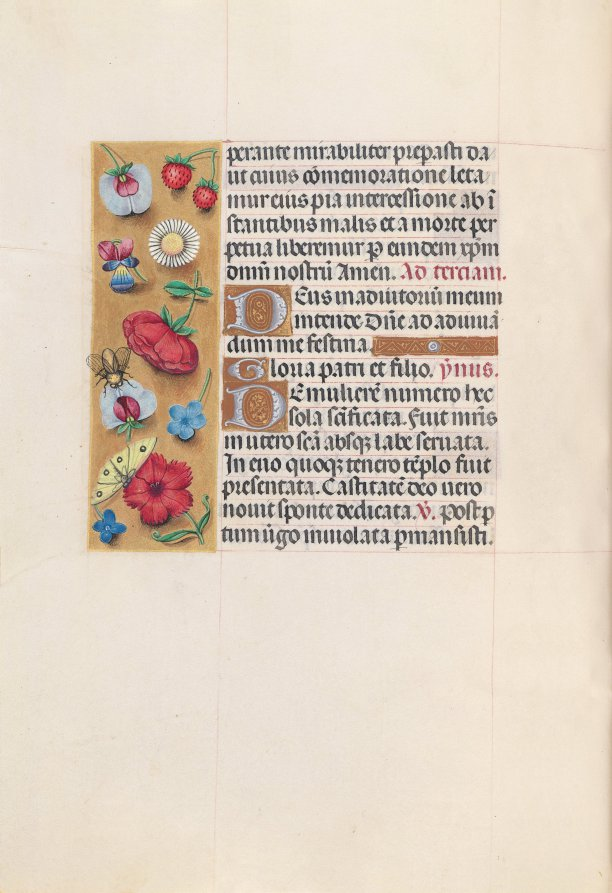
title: Hours of Queen Isabella the Catholic, Queen of Spain: Fol. 82v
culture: Flanders, Ghent and Bruges, late 15th century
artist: Master of the First Prayerbook of Maximillian (Flemish, c. 1444–1519)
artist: and Associates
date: c. 1500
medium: ink, tempera, and gold on vellum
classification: Bound Volume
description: This manuscript was illuminated by a circle of at least five highly organized manuscript painters active in the Flemish cities of Ghent and Bruges. The principal illuminator was Alexander Bening, who painted the majority of the book's miniatures. Manuscripts produced by this circle of artists are renowned for the decoration of their borders, which typically feature a rich variety of realistically-painted flowers, birds, and butterflies. This prayer book, called a book of hours, was intended not for a cleric, but for the private devotions of a lay person-in this case, Isabella the Catholic, Queen of Spain (1451-1504). Isabella's coat of arms embellishes the book's frontispiece. It is unlikely that the book was commissioned by the Queen herself; rather, she probably received it as a diplomatic gift from someone courting her patronage, perhaps Cardinal Francisco Jimenez de Cisneros. A Franciscan friar, Jimenez was dependent upon Isabella for his advancement, first to the post of Queen's confessor in 1492, and then to Archbishop of Toledo in 1495.